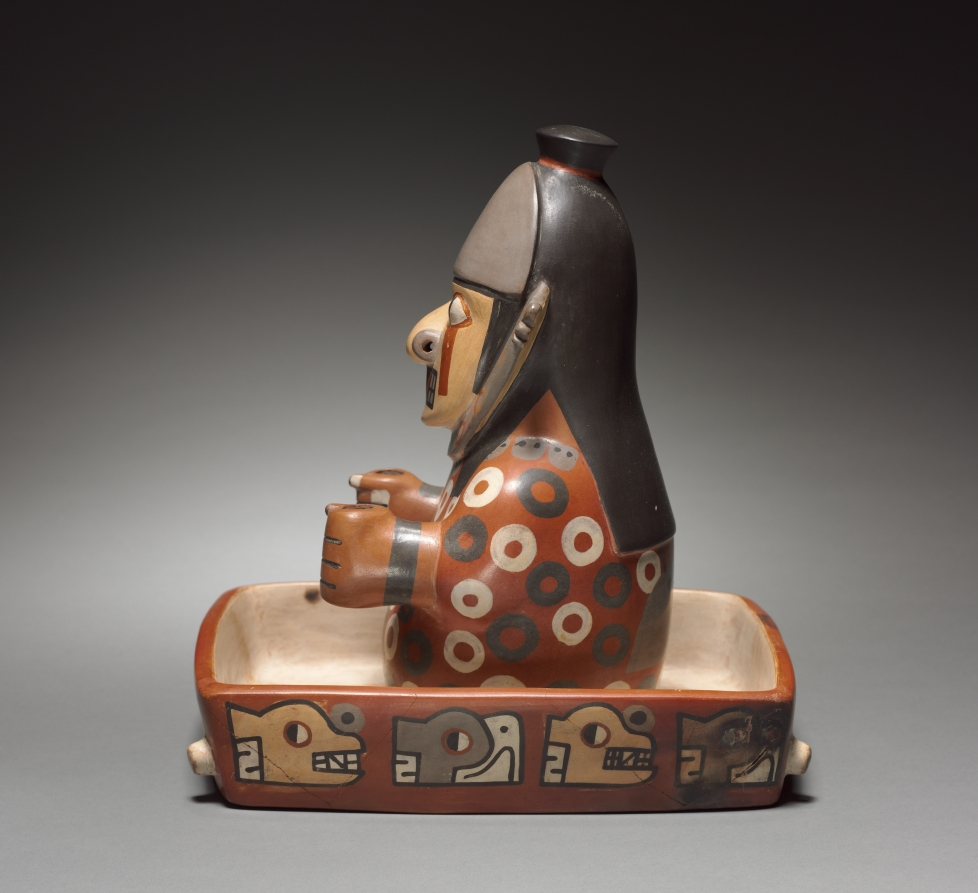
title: Figure in a Litter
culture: Wari (Pachacamac) style, Middle Horizon, Epoch 2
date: 500–900 (Thermoluminescence date, 590–1090)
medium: earthenware with colored slips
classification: Ceramic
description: Whether a deity, ancestral mummy, or masked human, this figure signals power. The divided eyes and fangs are traits of supernatural beings. The hands are cupped around holes that once perhaps held staffs, symbols of human and divine authority. And the litter was a mode of travel reserved for those of high station; the knobs refer to poles that rested on the shoulders of human bearers.